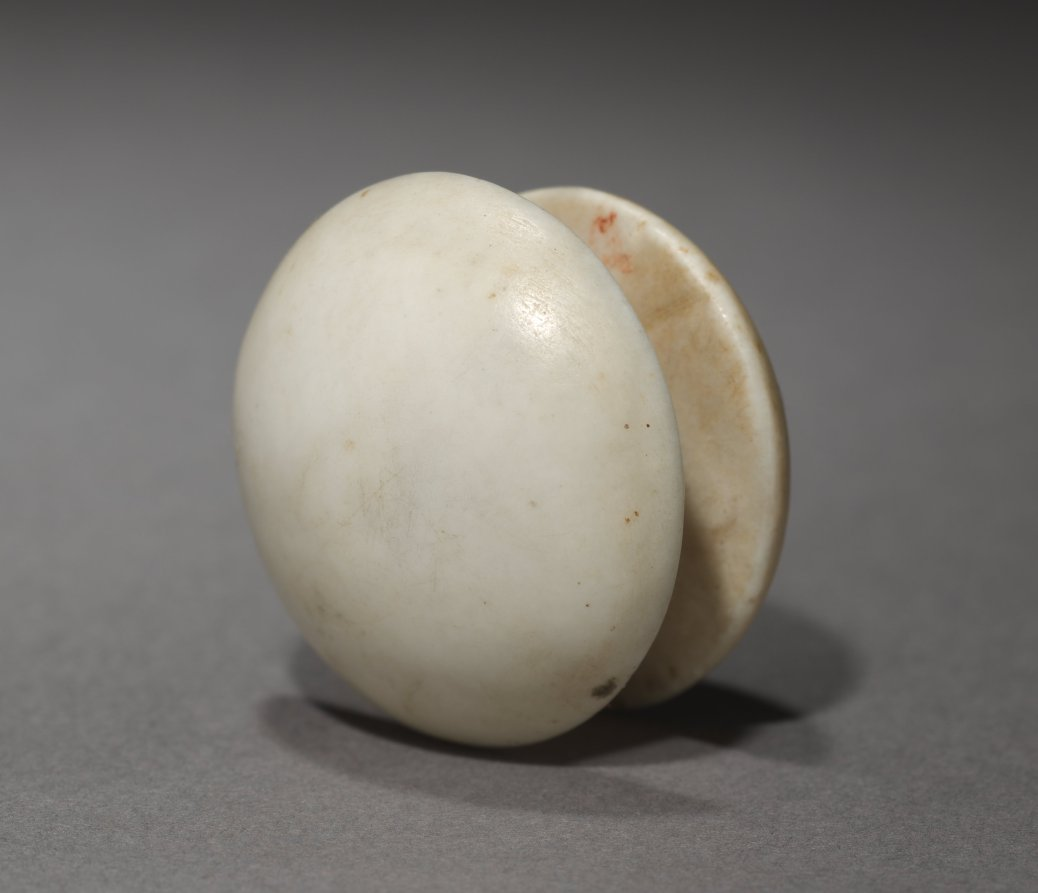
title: Pair of Ear Studs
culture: Egypt, New Kingdom (1540–1069 BCE), Dynasty 18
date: 1540–1296 BCE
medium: travertine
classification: Jewelry